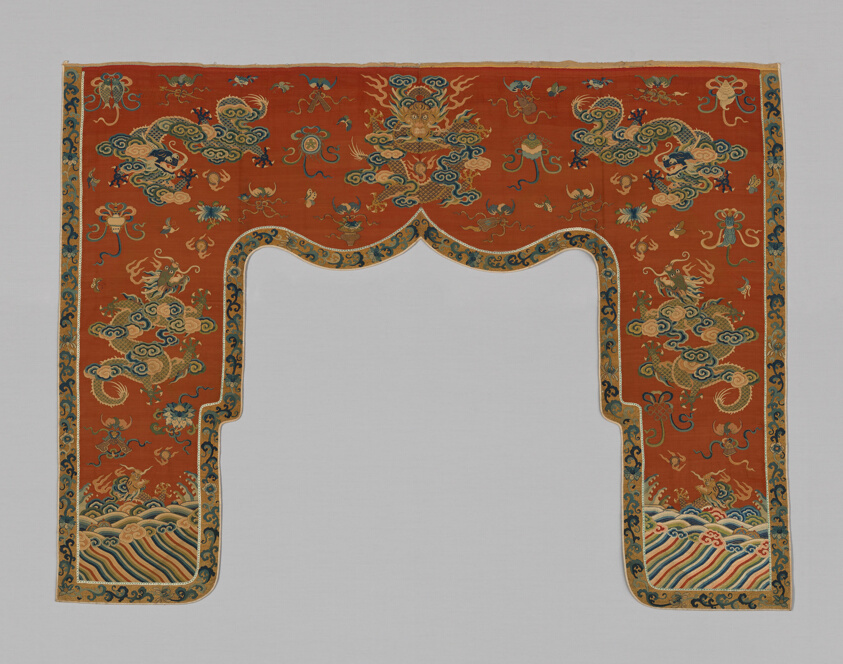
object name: Textile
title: Valance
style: qianlong, qing, Chinese (culture or style), East Asian, asian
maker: China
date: Qing dynasty (1644–1911), 1875/1900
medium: weaving with silk threads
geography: China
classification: weaving - tapestry; weaving; textile